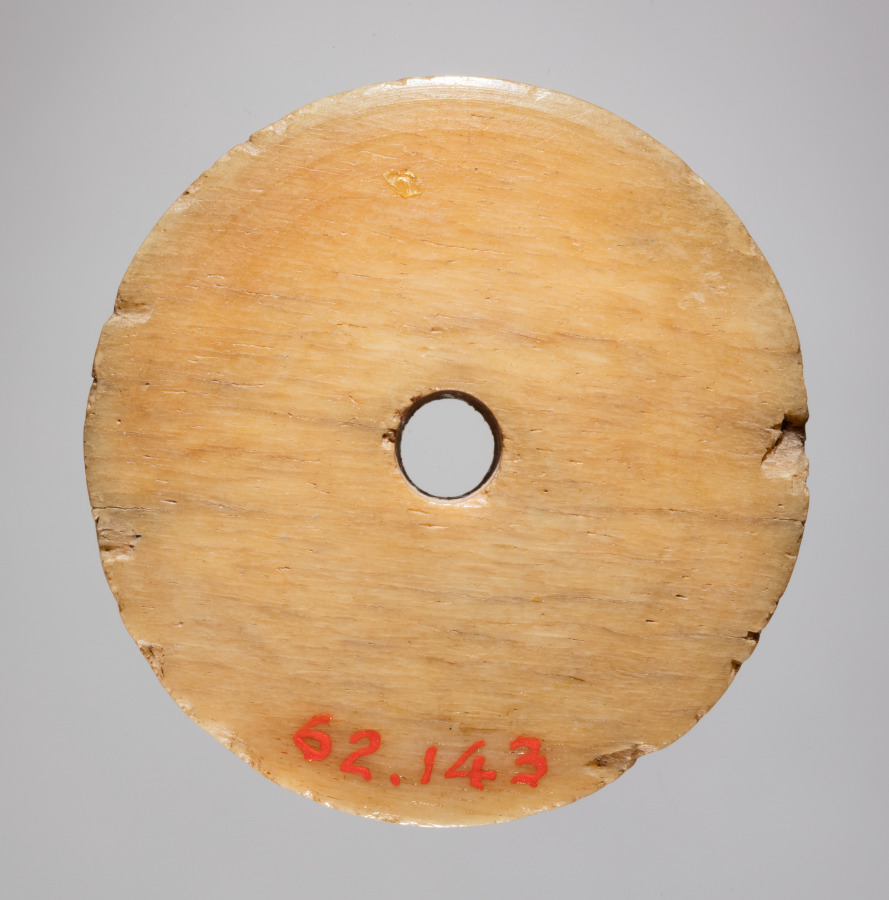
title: Spindle Whorl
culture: Iran, early Islamic period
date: 700s - 900s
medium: bone, incised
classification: Spindle Whorl